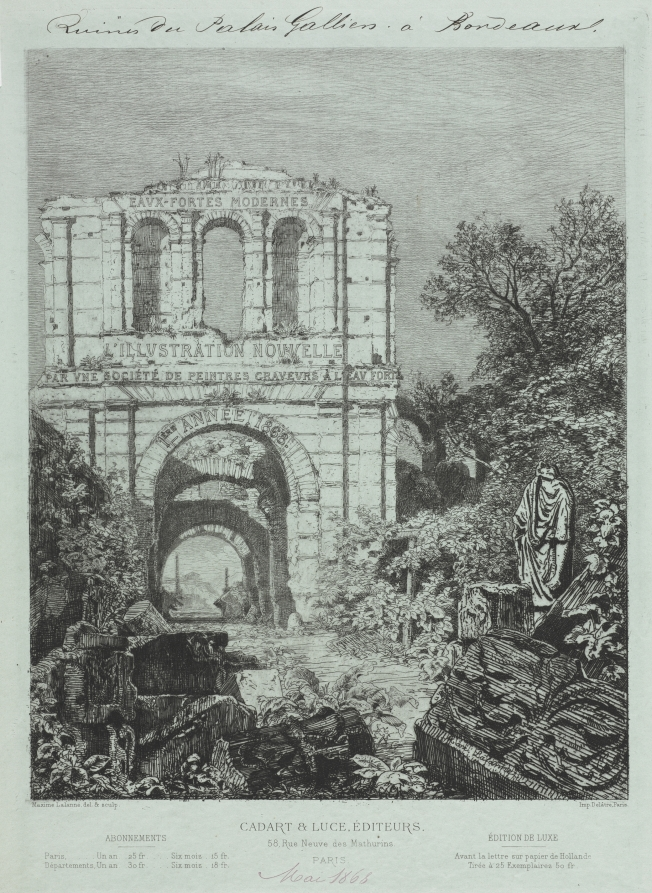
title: Ruins of the Gallien Palace in Bordeaux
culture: France, 19th century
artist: Maxime Lalanne (French, 1827–1886)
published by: Cadart & Luce, Paris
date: 1866–68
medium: etching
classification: Print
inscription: top margin, in pen and black ink: Ruines du Palais Gallien à Bordeaux